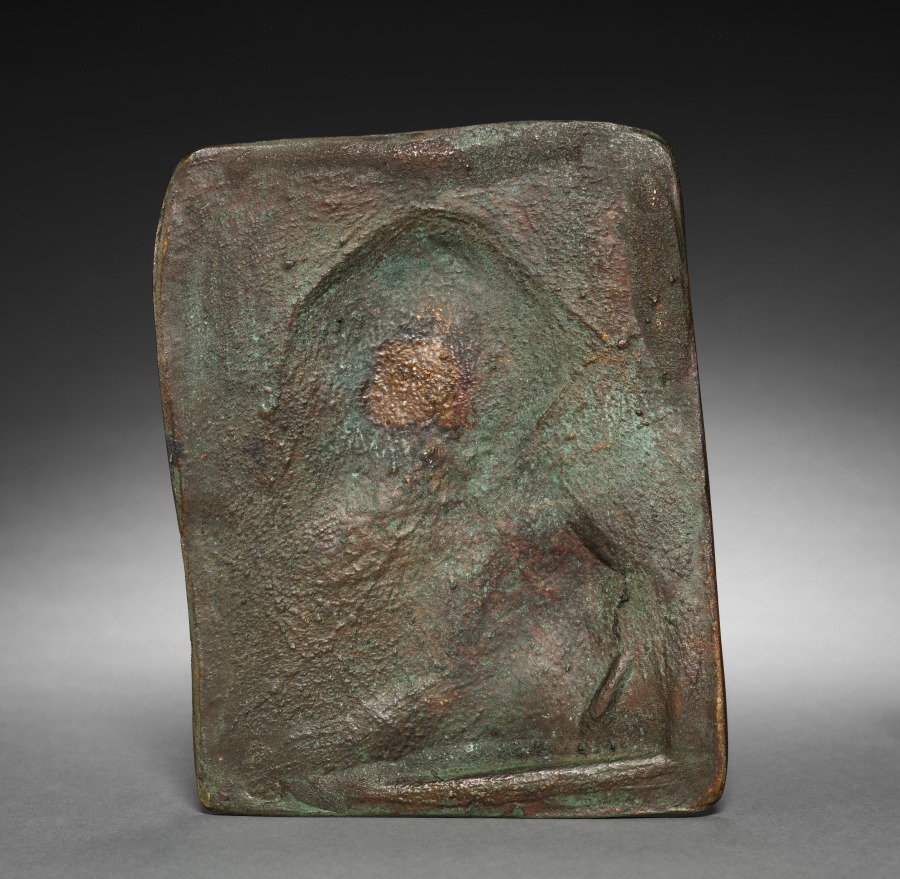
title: Zola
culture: France, 19th century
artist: Alexandre-Louis-Marie Charpentier (French, 1856–1909)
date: 1898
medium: bronze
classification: Sculpture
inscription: inscription incised by hand in mold in upper right corner: "19 Mars/1898" inscribed in lower right by hand in the mold: the number 9 and the letters AU